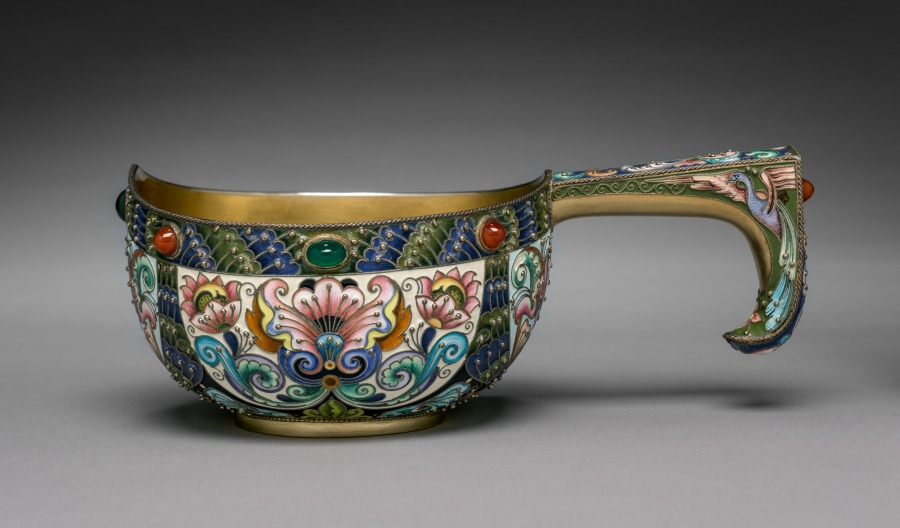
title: Kovsh (Wine Vessel)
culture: Russia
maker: House of Fabergé (Russian, 1842–1918)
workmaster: attributed to Feodor Ivanovich Rückert (Russian, 1840–1917)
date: 1896–1906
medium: silver gilt, enamel, cabochon gems, chrysoprases, carnelians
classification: Miscellaneous